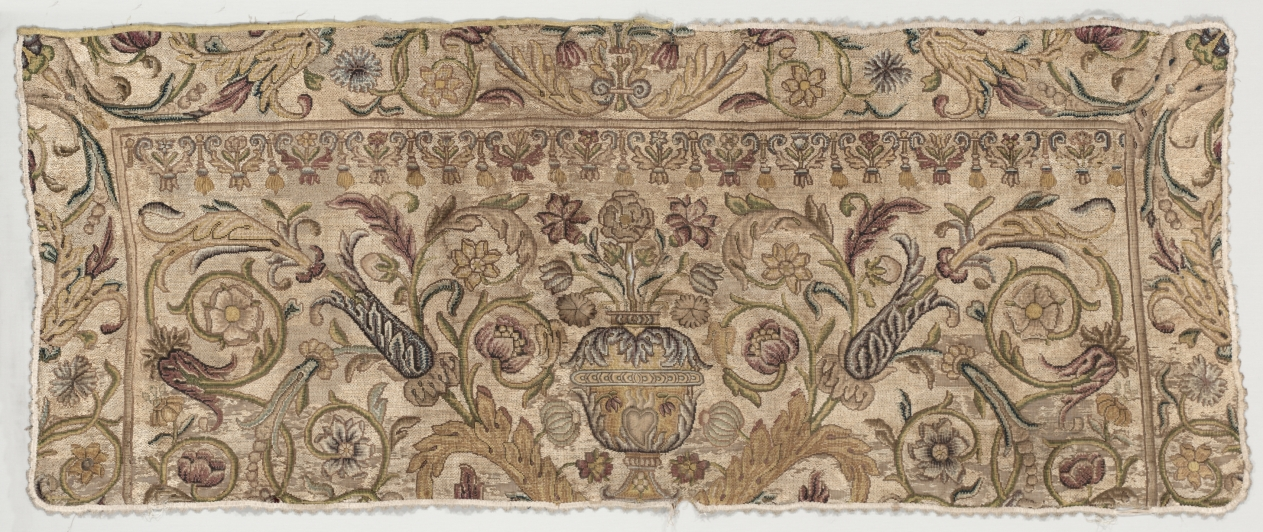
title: Embroidered Panel or Altar Front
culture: Italy, 17th century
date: 1600s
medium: embroidered silk on linen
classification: Embroidery